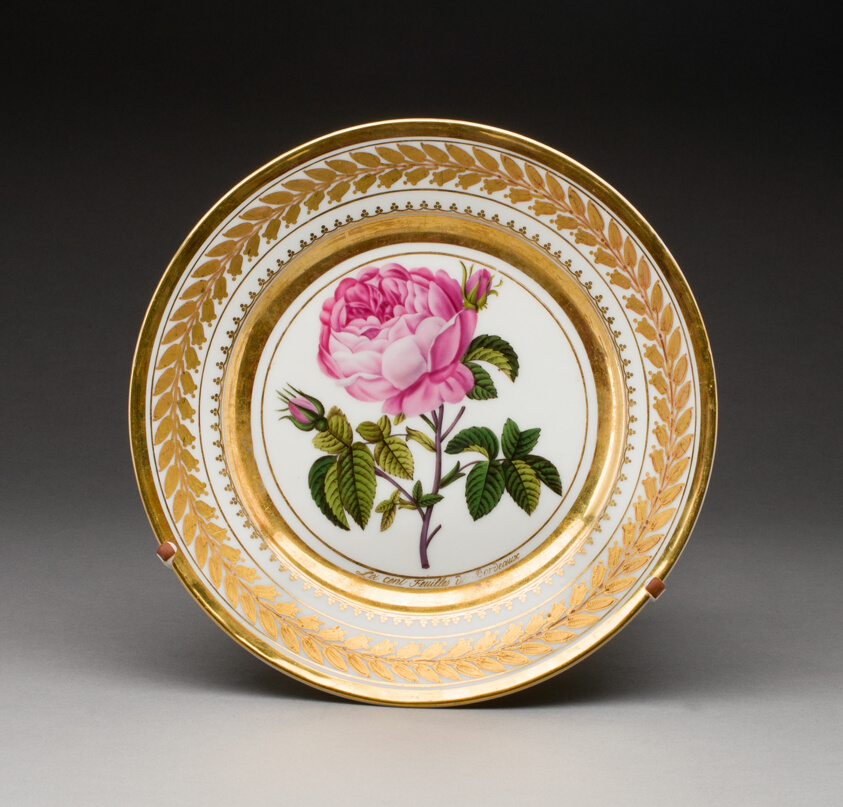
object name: Ceramics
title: Dessert Plate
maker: Prince Iusupov Porcelain Factory (Russian, 1814-1831)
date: 1826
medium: Hard-paste porcelain, polychrome enamels, and gilding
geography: Moscow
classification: plate (general, dish); dish (vessel); tableware; ceramics; porcelain; european decorative arts